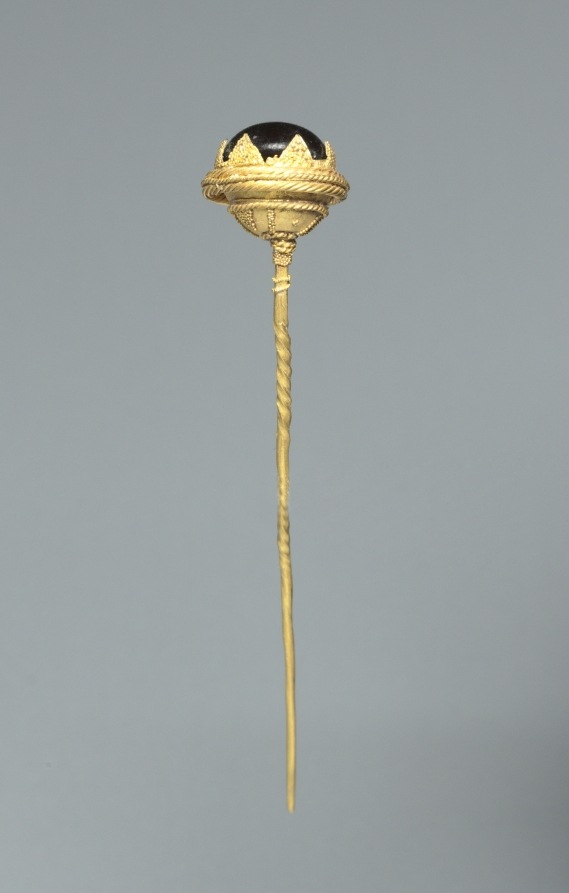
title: Straight Pin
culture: Etruscan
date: c. 500 BCE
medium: gold and glass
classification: Jewelry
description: This gold straight pin is topped with a red glass bead set in a finial. Braided gold wire and granulated triangles surround the bead. Tiny spheres forming more triangles decorate the underside of the finial, some perhaps lost. The pin is gently twisted below the finial. Although it appears to be garnet, the bead in this pin was determined to be glass after close examination by two gemologists from the Natural History Museum.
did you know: This pin was likely used to pin back women’s hair.